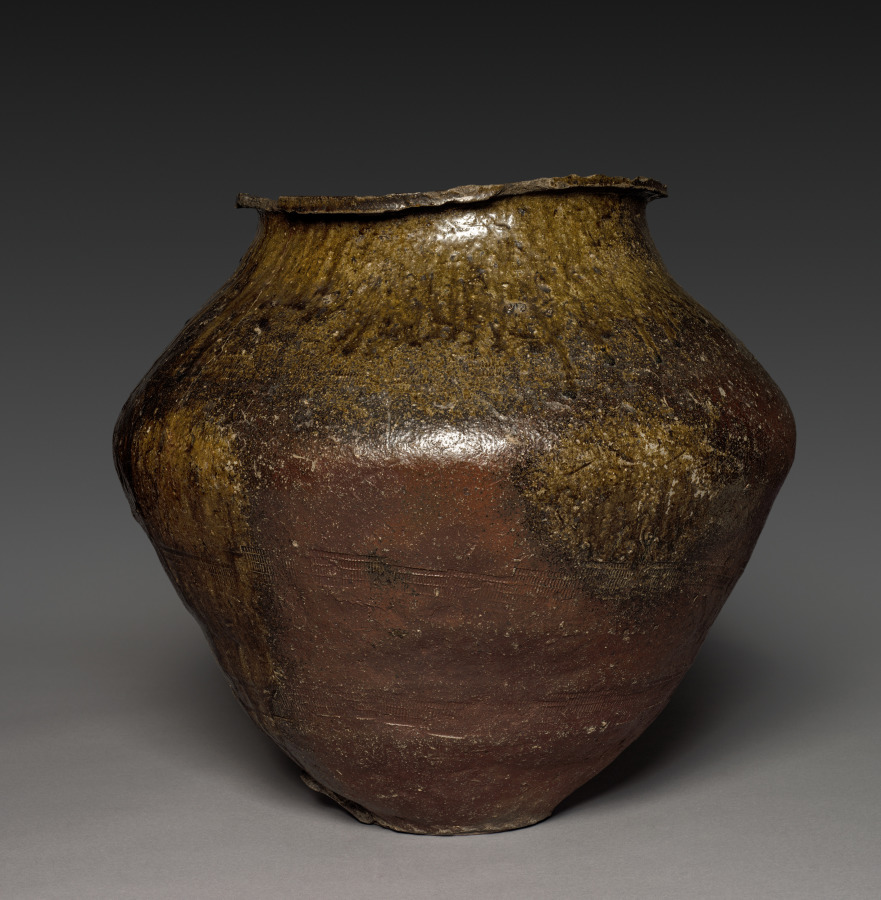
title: Storage Jar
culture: Japan, Nanbokuchō period (1336–92)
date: 1350–99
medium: Stoneware with natural ash glaze and impressed designs (Tokoname ware)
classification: Ceramic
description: This storage jar was made by piling coils of clay atop one another, smoothing the inner and outer surfaces, and allowing the clay to dry before adding another section of the form. The wide rim and mouth were then added using a potter’s wheel. Because of its small base, the vessel could stand safely on a narrow step on the steep slope of a rising kiln floor. Such kilns were built into the side of a hill and used wood for firing. The natural ash glazes took about a week to 10 days to form.